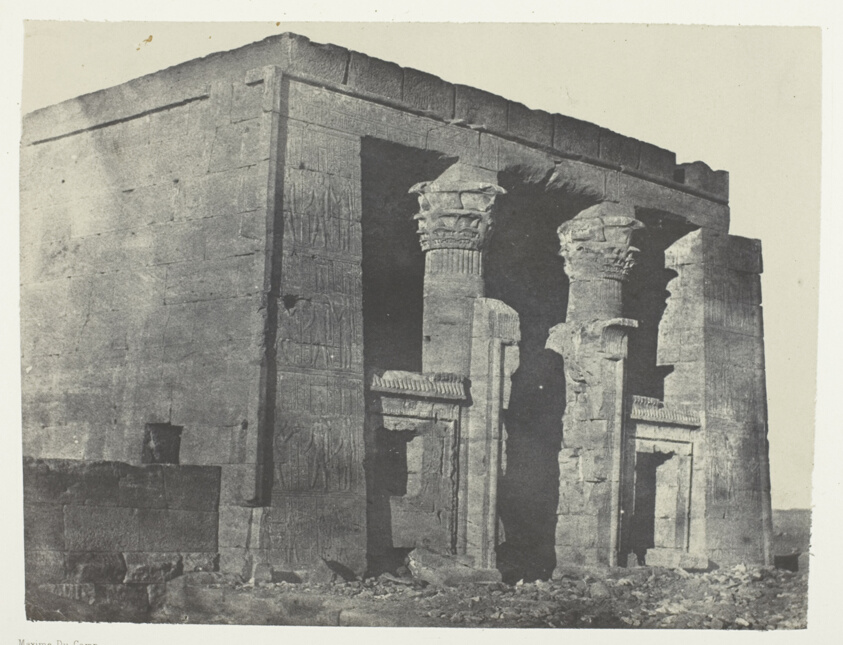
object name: Photograph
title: Temple De Dakkeh, Naos; Nubie, plate 95 from the album "Egypte, Nubie, Palestine et Syrie" (1852)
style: 19th century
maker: Maxime Du Camp (French, 1822–1894)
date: 1849/51, printed 1852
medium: Salted paper print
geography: France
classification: salted paper print; photographic process; photography; photograph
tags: Collected by Hugh Edwards, Egypte, Nubie, Palestine et Syrie